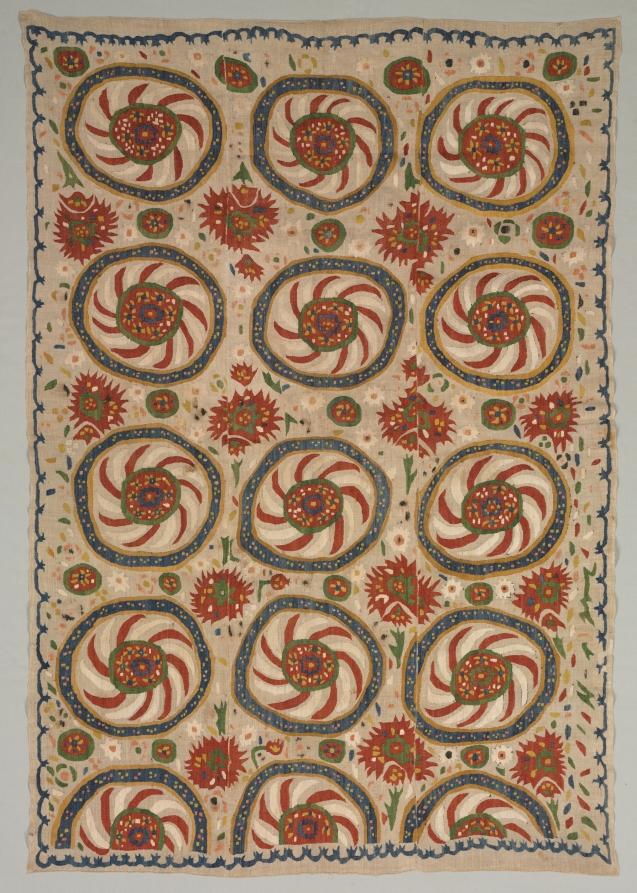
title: Embroidered Cover or Curtain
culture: Turkey, 17th-18th century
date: 17th-18th century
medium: embroidery: silk on linen tabby ground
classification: Embroidery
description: This exuberant pattern of spiraling roundels enlivens a ground of isolated vegetation, despite disintegrated dark brown–black silk thread outlines. Professional draftsmen would have drawn the pattern in ink on the reverse side of several loosely attached, plain linen cloths. They were separated for embroiderers to follow and then reassembled; frequently, the designs do not match perfectly at the seams.